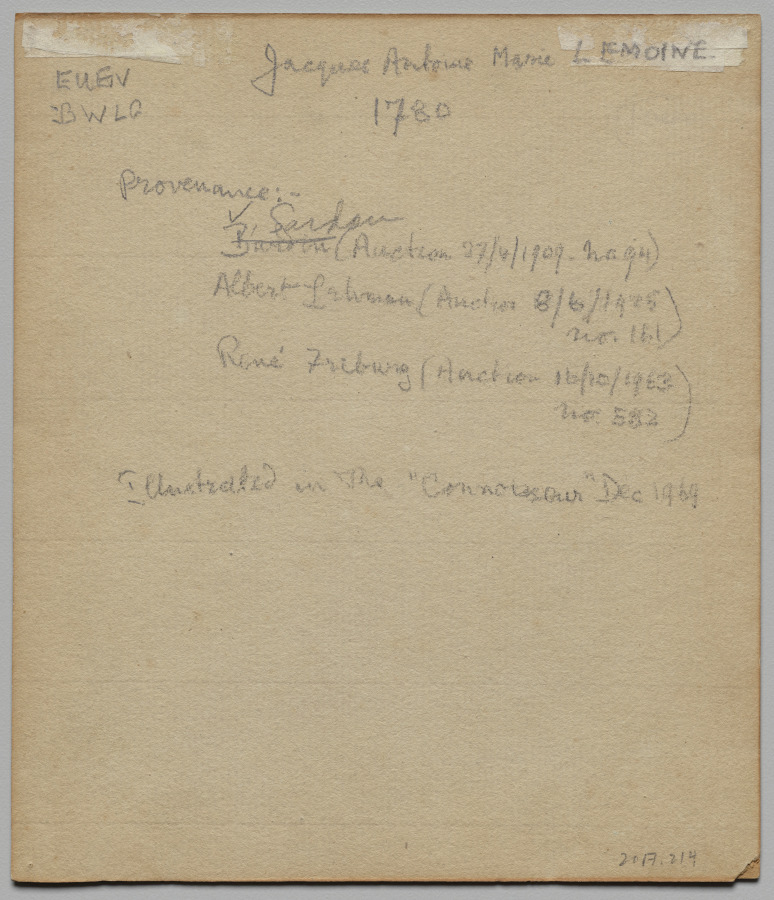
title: Bust of a Nude Woman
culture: France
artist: Jacques-Antoine-Marie Lemoine (French, 1751–1824)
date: 1780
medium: Black chalk and stumping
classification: Drawing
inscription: lower center, on original mount, in black ink: Lemoine 1780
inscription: verso of card: upper left, in graphite: EUEW / BWLG; upper center, in graphite: Jacques Antoine Marie LEMOINE / 1780; upper center, in graphite: Provenance: / V. Sardou (Auction 27/4/1909 no. 94) / Albert Lehman (Auction 8/6/1925 no. 161) / René Friburg (Auction 16/10/1963 no. 582); center, in graphite: Illustrated in the “Connoisseur” Dec 1969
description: Lemoine was famous for his black chalk portraits like this example of a bust of a nude girl. Given the sitter’s individualized features, this image could represent a specific portrait; however, her identity is now lost to modern viewers. Below the portrait on the blue oval mount, the artist signed and dated the work to indicate his authorship.